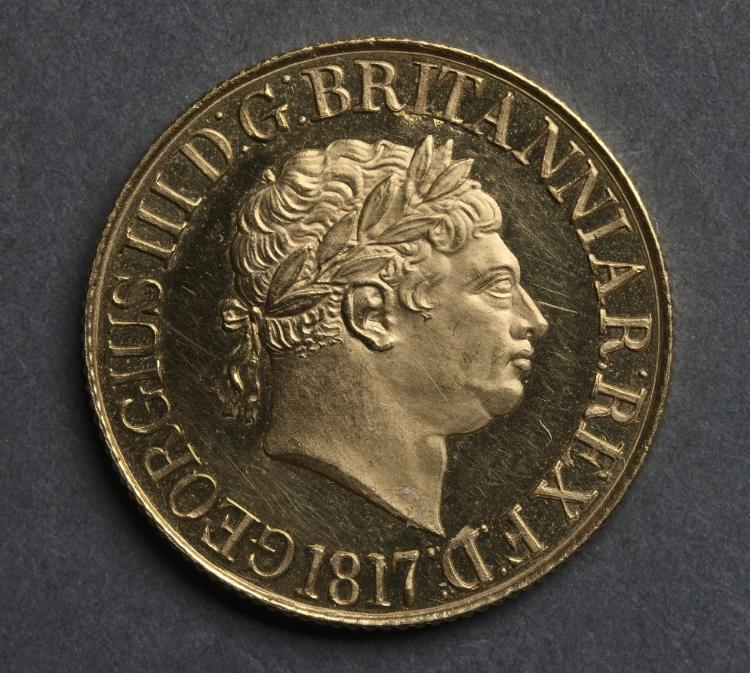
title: Sovereign: George III (obverse)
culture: England, George III, 1760-1820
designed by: Benedetto Pistrucci (Italian, 1784–1855)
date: 1817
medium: gold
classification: Coins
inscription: GEORGIUS III D.F. BRITANNIAR. REX F.D.